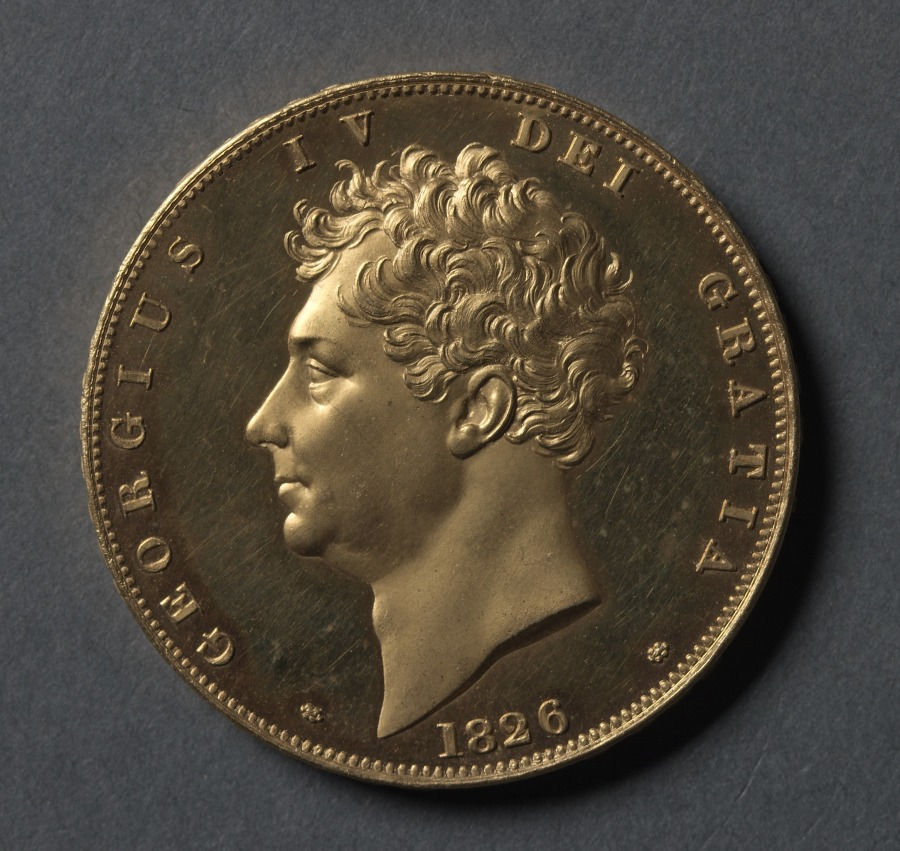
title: Five Pound Piece: George IV (obverse); Shield of Arms (reverse)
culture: England, George IV, 1820-1830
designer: Jean Baptiste Merlen (French, 1769–1850)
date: 1826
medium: gold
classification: Coins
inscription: DEI GRATIA * 1826 * GEORGIUS IV.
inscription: BRITANNIARUM.REX FID: DEF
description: Only pattern five-pound pieces were struck during the reign of George IV, none being put into circulation. In this reign, specimen proof sets appeared for the first time in 1823, and the pattern five- and two-pound pieces as well as the pattern silver crown were included in the sets.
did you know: The shield is quartered with the arms of England (1 & 4), Scotland (2), and Ireland (3) with the crowned arms of the Duchy of Brunswick and Lüneburg at the center.